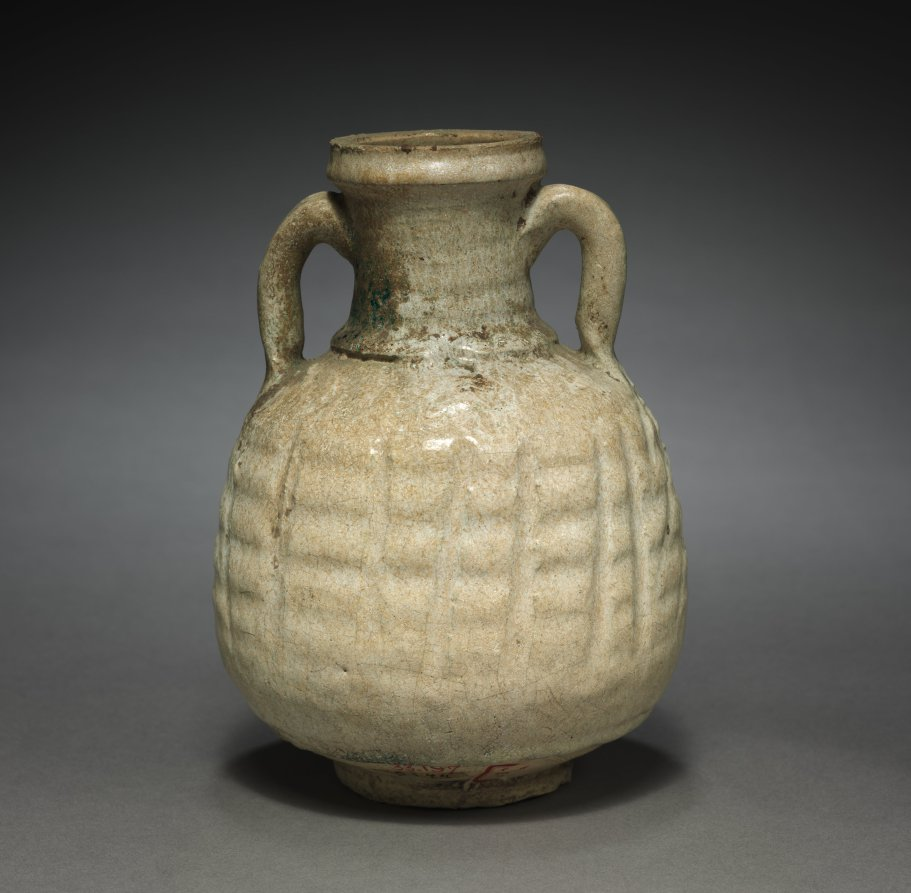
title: Vase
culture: Parthian Empire (247 BCE–224 CE)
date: 1–200 CE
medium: terracotta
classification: Ceramic